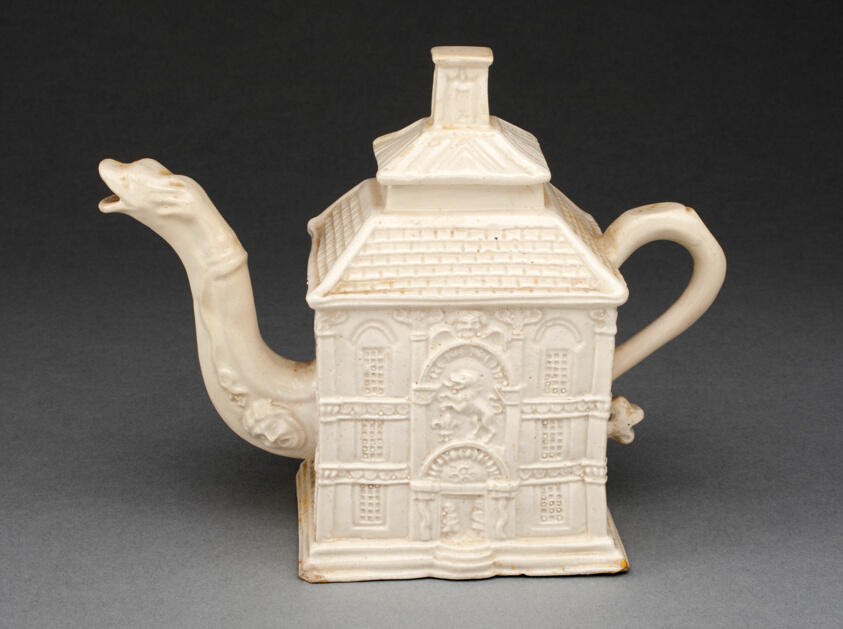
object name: Ceramics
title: Teapot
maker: Staffordshire, England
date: c. 1750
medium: Salt-glazed stoneware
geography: Staffordshire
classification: teapot; salt-glazed stoneware; european decorative arts; stoneware; ceramics